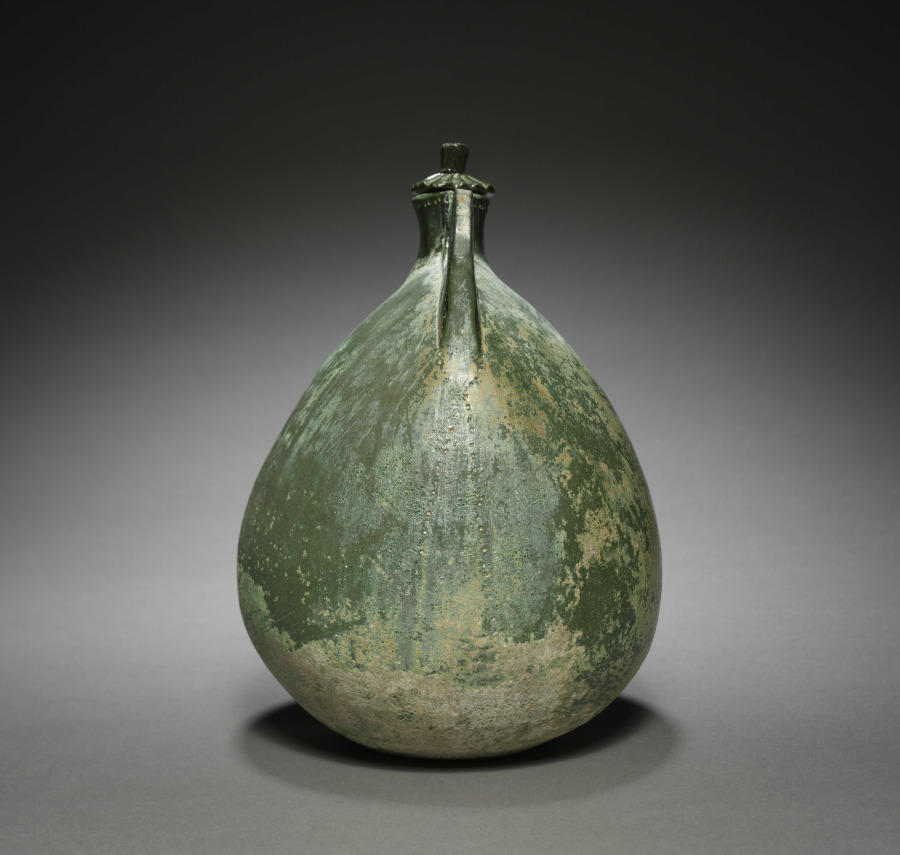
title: Leather Bag-Shaped Flask with Cover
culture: Northeast China, Liao dynasty (916-1125)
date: 916–1125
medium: earthenware with green glaze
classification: Ceramic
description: Flasks like these derive their shapes from leather bags; even the edges are finely rouletted to resemble the seams of sewn leather. These were used by the nomadic Khitan people who established the Liao kingdom in Inner Mongolia, Manchuria, and North China. Such wares represented the Liao adoption of the Tang Chinese ceramic tradition, and yet they expressed ethnic identity and new innovations resulted from the cultural borrowing.